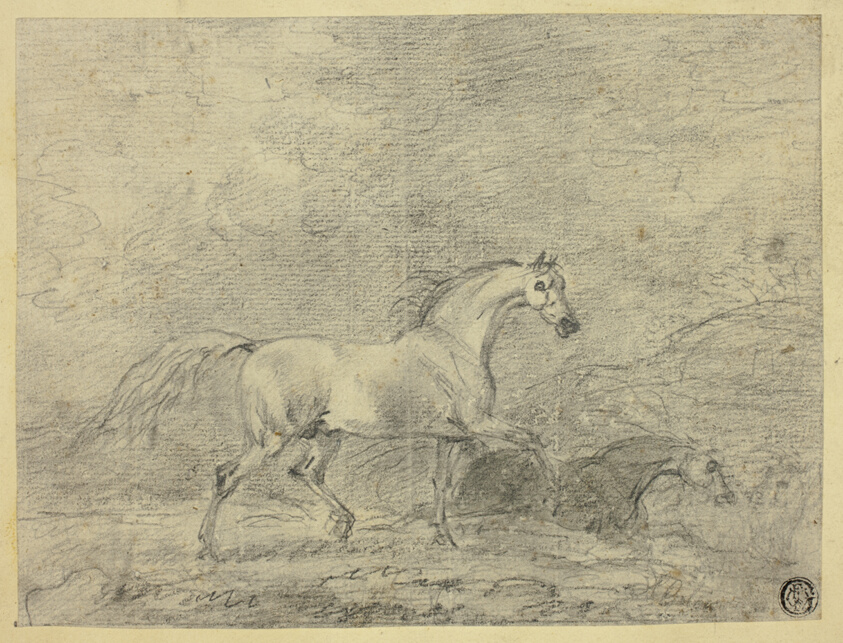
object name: Drawing and Watercolor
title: Horses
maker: Sawrey Gilpin (English, 1733-1807)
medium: Graphite on ivory laid paper, laid down on cream card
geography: England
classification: graphite; drawings (visual works); prints and drawing; paper